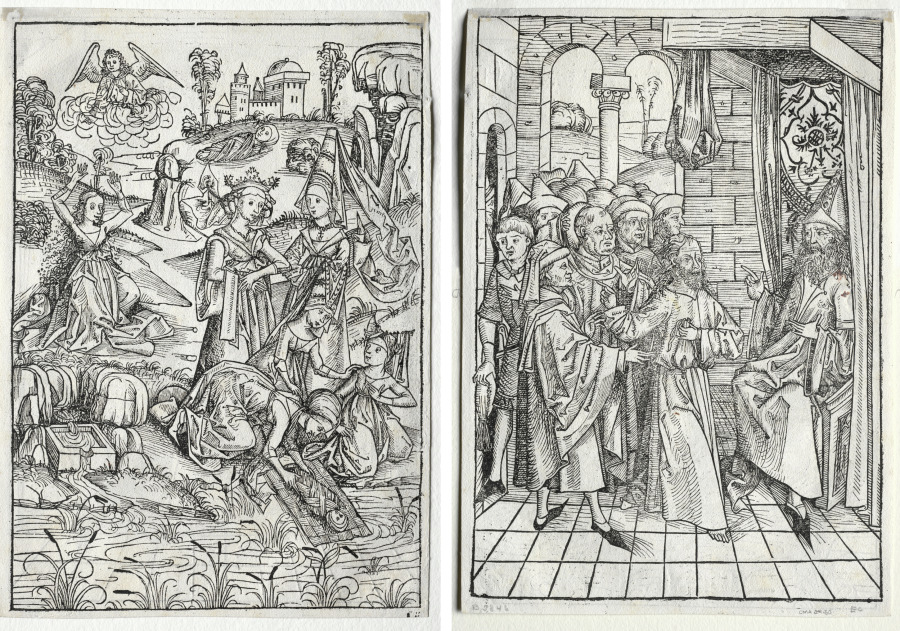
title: Der Schatzbehalter: Moses Found by Pharaoh's Daughter (recto); Der Schatzbehalter: Christ before Caiaphas (verso)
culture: Germany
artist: Michael Wolgemut (German, 1434–1519)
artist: Wilhelm Pleydenwurff (German, 1450–1494)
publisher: Anton Koberger (German, 1435-1513)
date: 1491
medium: woodcut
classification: Print